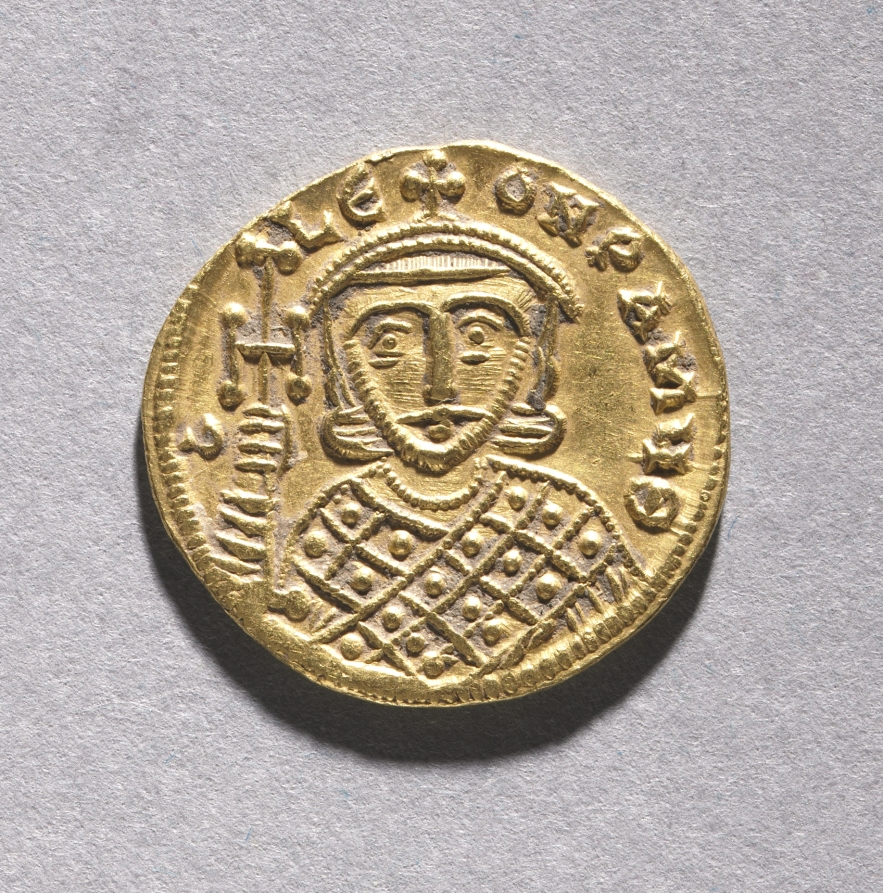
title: Solidus with Leo IV the Khazar and His Father Constantine V Copronymus (obverse)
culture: Byzantium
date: c. 751–775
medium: gold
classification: Coins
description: The vast number of surviving Byzantine coins attests to the level of trade across the empire. Controlled and supervised by the emperor, the producers of coins took care to represent his authority and reflect his stature. Talented artists were recruited to engrave the dies (molds) used for the striking of coins. Emperors increasingly came to include their heirs and co-emperors on their coinage, as well as other family members or even earlier rulers. Coins were recognized, then as now, as small, portable works of art. With their inscriptions and images, Byzantine coins provide valuable documentation of historical events and a record of the physical appearance of the emperors. The coins shown here include the solidus, the basic gold coin of 24 karats; the tremissis, a gold coin of one-third the weight and value of the solidus; and the nomisma, which in the 10th century replaced the solidus as the standard gold coin.